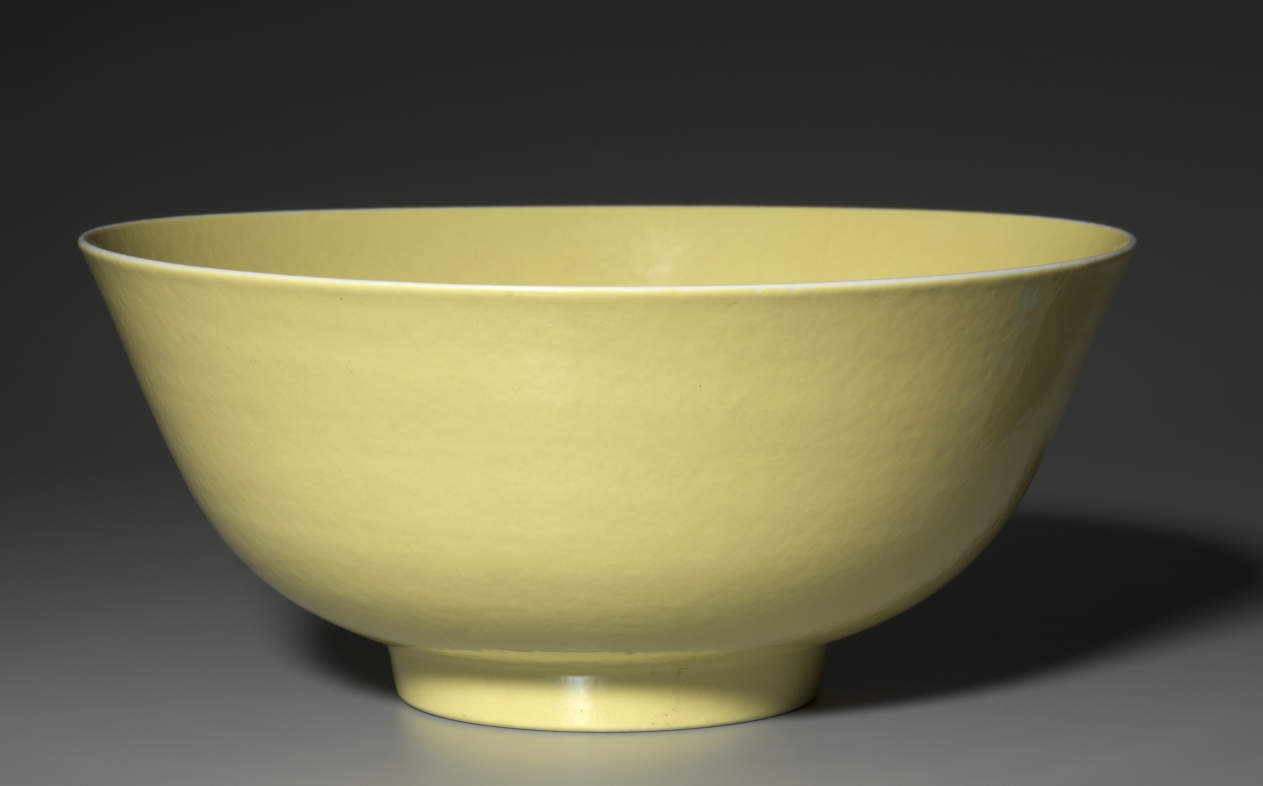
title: Large Bowl with Yellow Enamel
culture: China, Qing dynasty (1644-1911), Daoguang mark and reign (1821-50)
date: 1821–50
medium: enameled porcelain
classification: Ceramic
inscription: 大清道光年制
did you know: This monochromatic yellow dish was made for the imperial household.